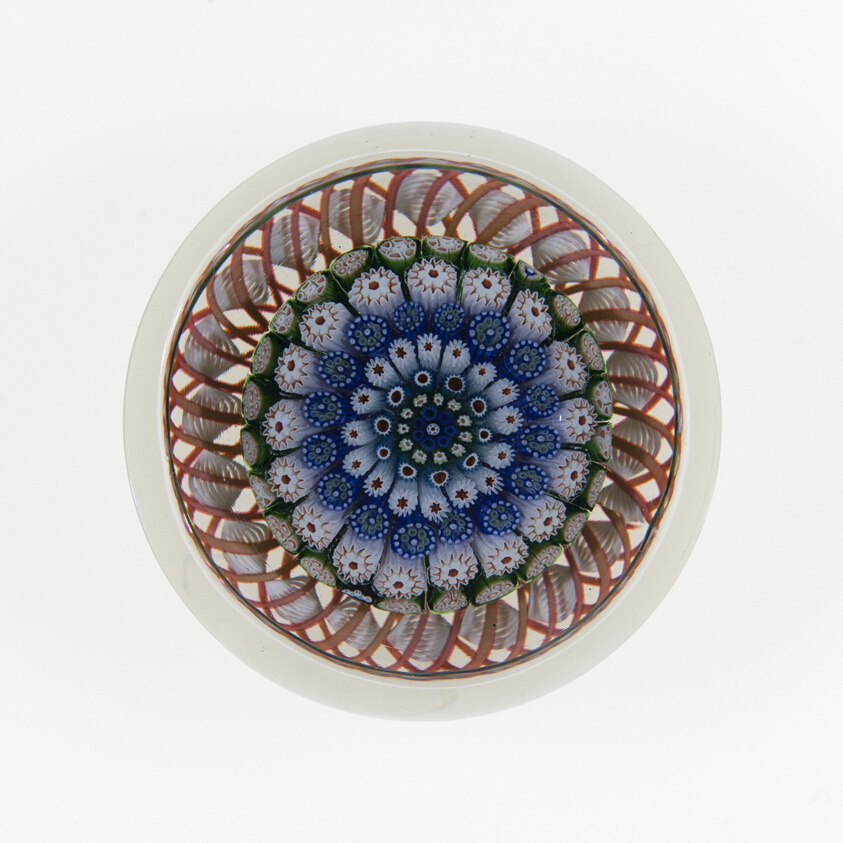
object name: Glass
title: Paperweight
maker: Saint-Louis Glassworks (Cristalleries de Saint-Louis); Lorraine, France, founded 1586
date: c. 1845–60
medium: Glass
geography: Saint-Louis-lès-Bitche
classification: paperweight; glass